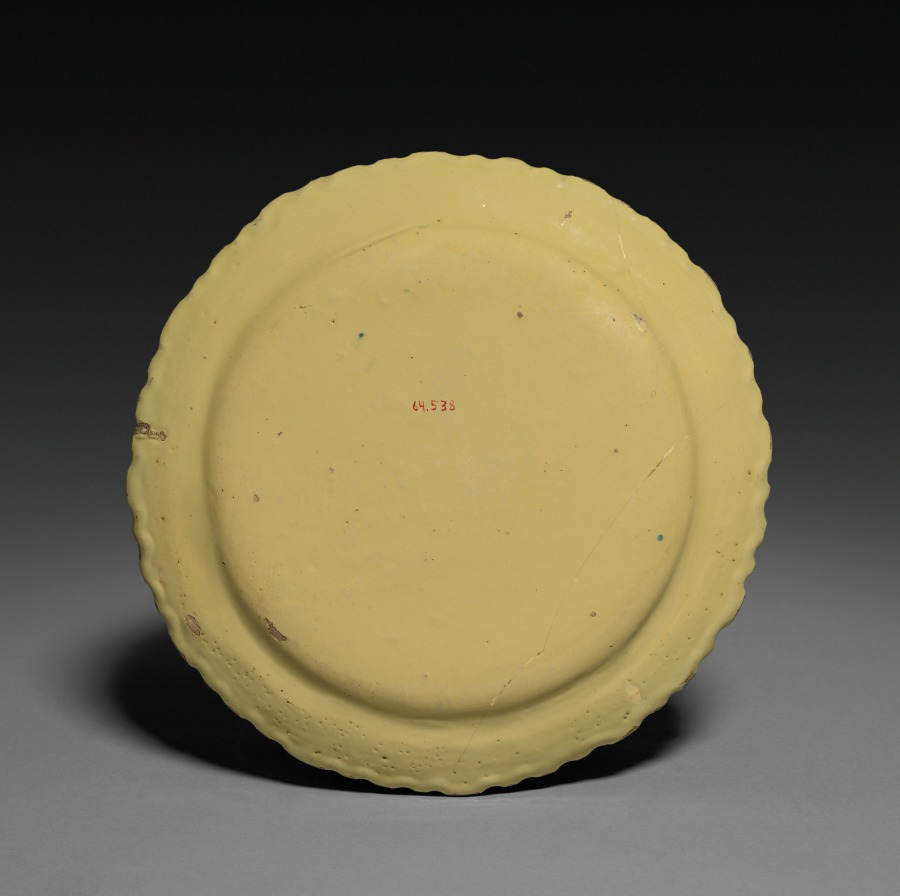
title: Plate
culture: France, 18th century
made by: Samadet Factory (French)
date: c. 1760–1765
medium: faience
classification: Ceramic